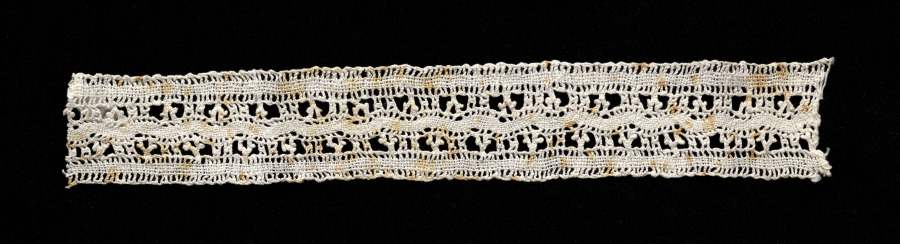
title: Lace Insertion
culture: Italy, Abruzzi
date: 1700s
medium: Bobbin lace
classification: Lace